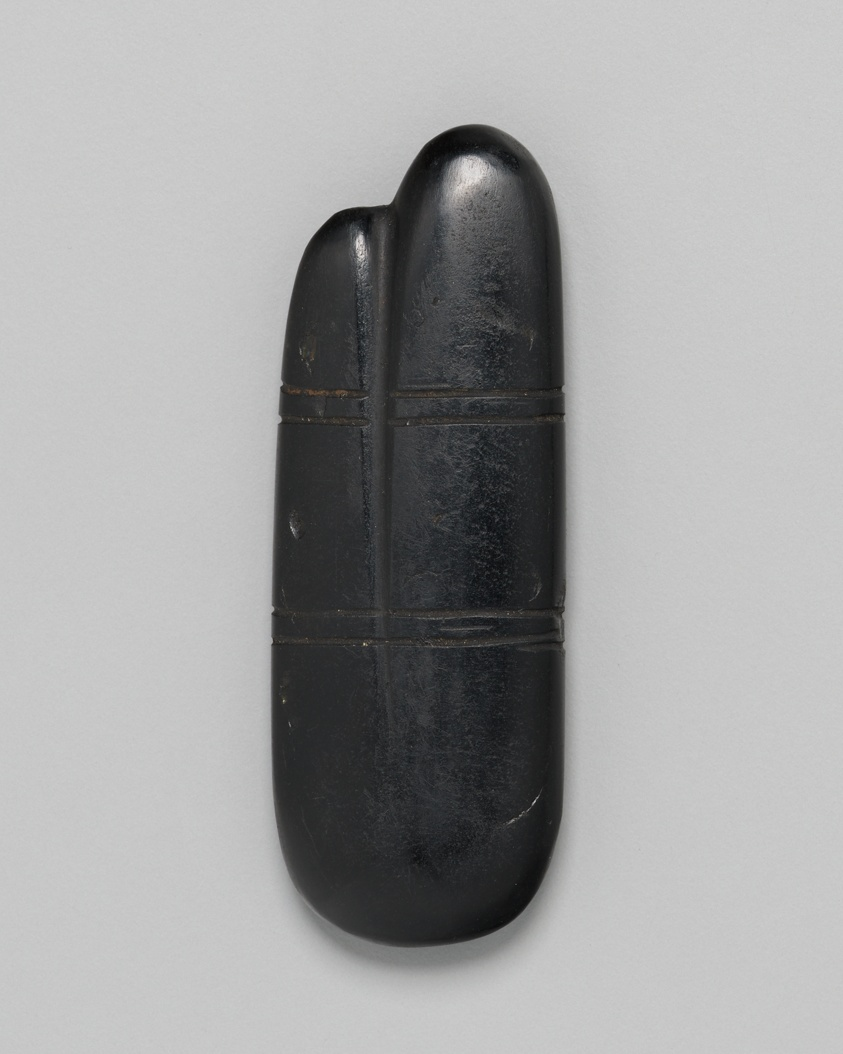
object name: Funerary Object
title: Amulet of Two Fingers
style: late period (egyptian), egyptian, ancient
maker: Egyptian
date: Late Period (664–332 BCE)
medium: Obsidian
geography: Egypt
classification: amulet; stone; ancient art